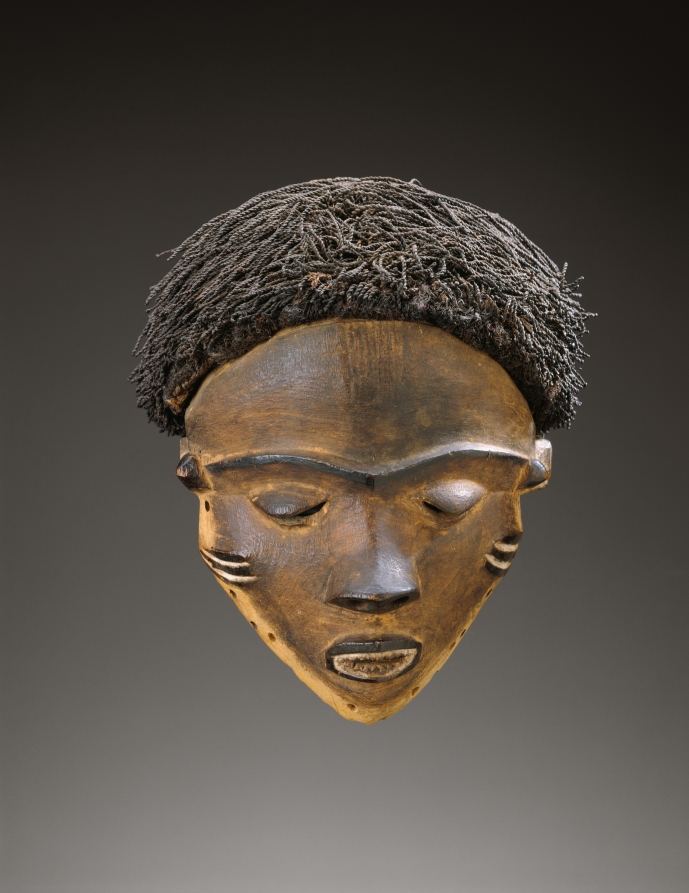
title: Female Mask (Gambanda or Kambanda)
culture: Africa, Central Africa, Democratic Republic of Congo, Pende-style maker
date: early 1900s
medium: Wood, plant fiber, and colorant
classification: Mask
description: Realized in typical Central Pende style, this mask is believed to represent gambanda, the chief's wife. In light of Pende theories about gender and physiognomy, the mask is an ideal expression of a woman's facial features and thus reflects her calm, obedient, peaceful, and self-controlled demeanor. The intricate hairstyle consisting of hundreds of miniature twists imitates a once fashionable hairdo. Pende sculptors inherited their position and often worked on the outskirts of the village so that few could see them at work.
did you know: This female mask would have performed in a collective multimedia event with audience participation.